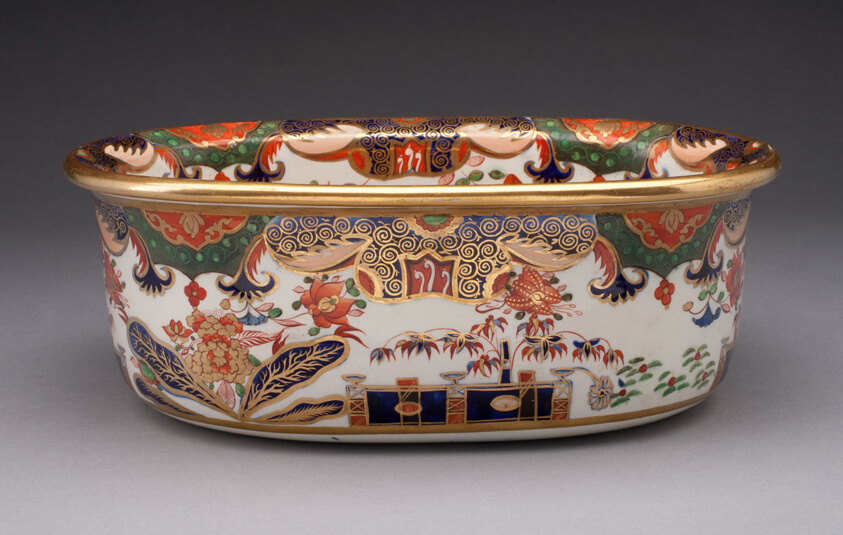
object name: Ceramics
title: Wine Cistern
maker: England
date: c. 1820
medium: Porcelain, Imari decoration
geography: England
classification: porcelain; european decorative arts; ceramics